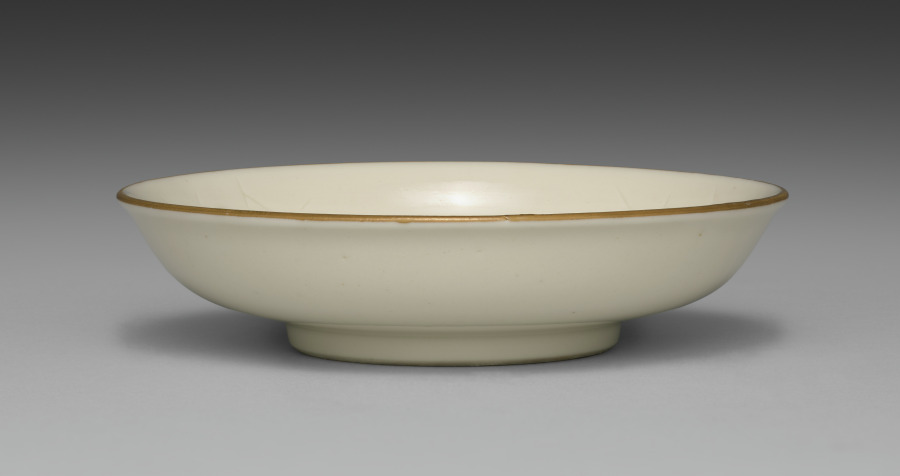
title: Small Dish from Dining Set with Plum Blossoms and Cracked-Ice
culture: Japan, Meiji period (1868–1912)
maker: Seifū Yohei II (Japanese, 1844–1878)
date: c. 1875–78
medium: Porcelain with molded designs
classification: Ceramic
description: Each item in this set has a delicate low-relief design of flowering plum branches over scattered, intersecting lines meant to resemble the cracked-ice surface of a frozen body of water and is signed on the base in gold pigment. While Yohei II produced many fine works in underglaze blue, like those produced by Kiyomizu Shichibei, he also made works in quite different styles later in his career, from the early 1870 s. In 1873, he was appointed purveyor to the Industrial Center of Kyoto Prefecture, a designation associated with Kyoto’s efforts to reach an international market through the port of Kobe; and from 1875 until his death, he was involved in national-level projects to present Japanese ceramics across the world. It was during this period that Yohei III was apprenticed to Yohei II, and it has been suggested that this set may in fact be an early example of Yohei III’s work, which he signed with his teacher’s name. Decorated with flowers resembling Japanese textile motifs, the set calls to mind the design of Yohei II’s pair of vases with plum blossoms in the Victoria and Albert Museum. Here, the elaborate trees created for a formal public exhibition setting have been translated into the approachable blossoms of the genteel domestic environment. While the designs are consistent across the pieces, each raised flower petal and pistil and each incised line in the ice was done by hand, so the cups, bowls, and dishes are similar yet unique. The bottoms of two boxes once identified the set’s owner, but the information has been deliberately obscured with black ink. However, inscriptions still visible appear to indicate two occasions, once at the end of July 1886 , and once again in June 1916 , when parts of the set were requested from Hokura in Niigata Prefecture. The location corresponds to a neighborhood in the present-day city of Jōetsu. The surname Tsuji 辻 also appears on a paper tag affixed to one of the box cloths. Future research may possibly reveal more about their provenance. A vase by Yohei III in a private collection combines the formal grandeur of the Yohei II vases in the Victoria and Albert Museum with the gentler design of this dining set, placing flowering plum trees against soft, scalloped-edge clouds resembling those in golden screens.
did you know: The dining wares have a creamy white coloration that the four boxes containing them identify as Korean in style.